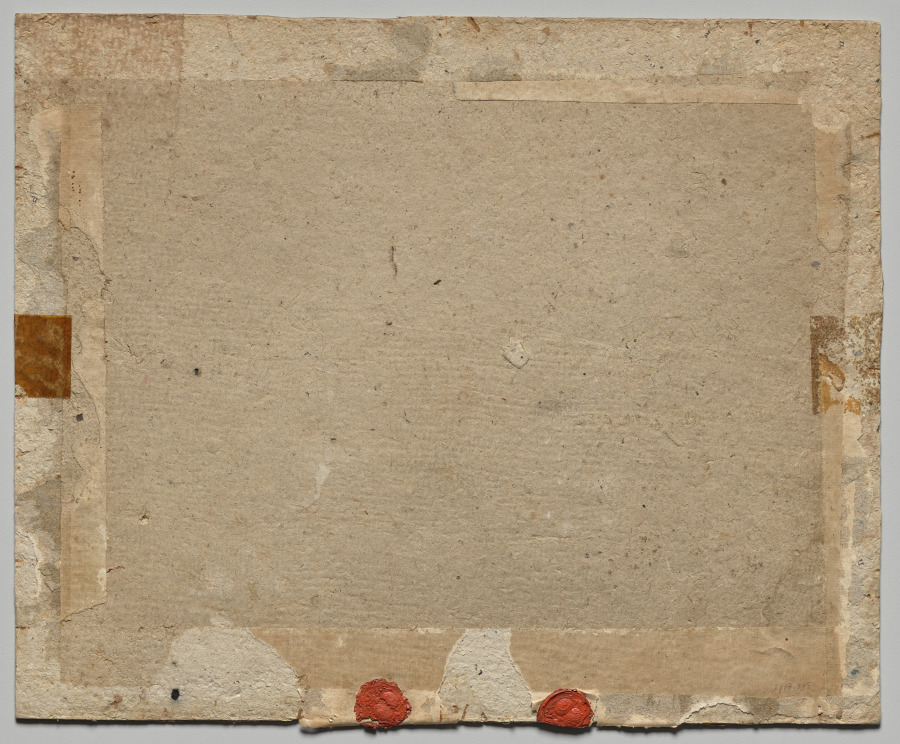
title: Monkey Preaching to Turkeys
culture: France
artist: circle of Christophe Huet (French, 1700–1759)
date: 1750–1800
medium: Gouache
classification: Drawing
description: This work belongs to a genre of imagery called singerie, which depicts monkeys dressed in human clothes parodying the actions of people. Here, a monkey preaches to a flock of turkeys from a wicker basket pulpit hanging from a tree. The turkeys, interpreted as symbols of foolishness, are deceived by the cunning primate in the disguise of a monk’s habit.